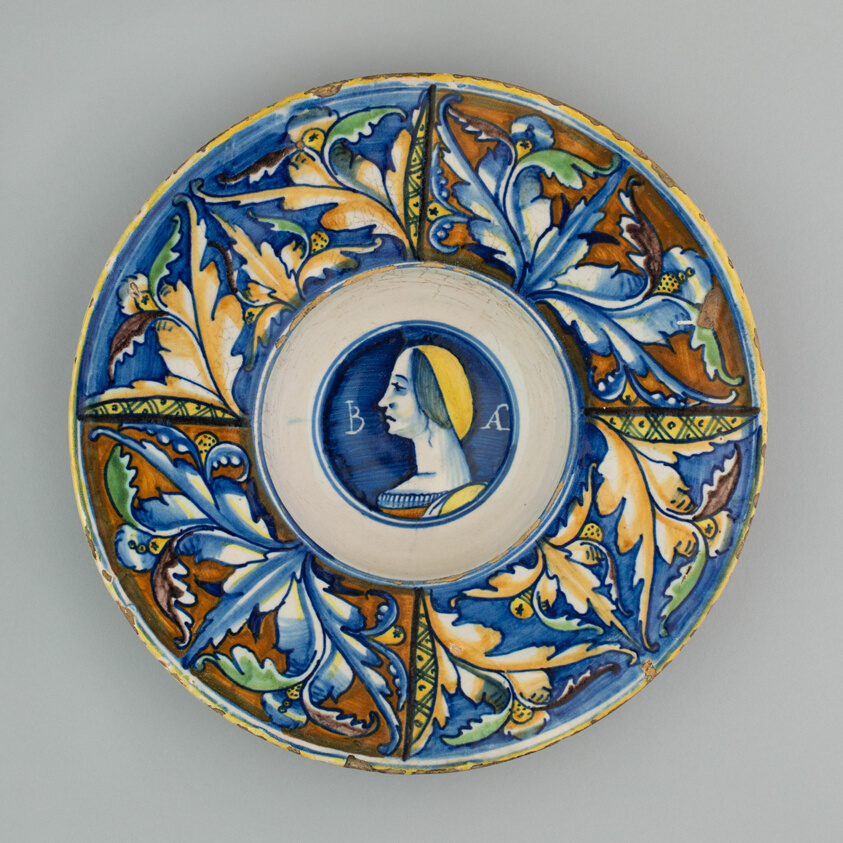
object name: Ceramics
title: Plate with Female Bust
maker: Italian, possibly Castel Durante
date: c. 1525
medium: Tin-glazed earthenware (maiolica)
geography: Urbania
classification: earthenware; european decorative arts; ceramics; decorative arts